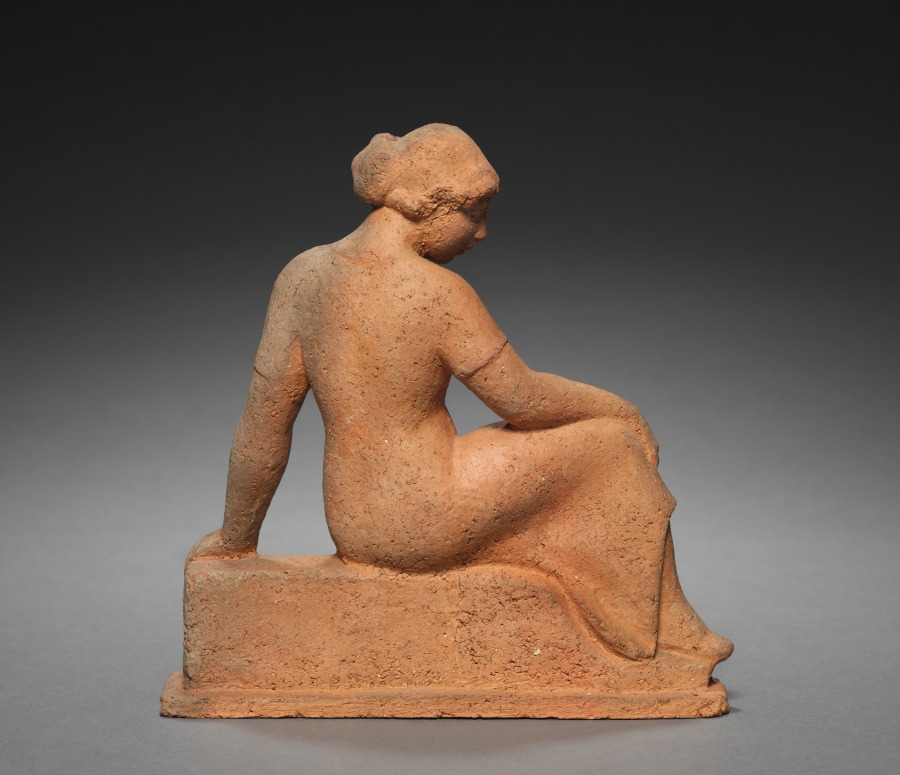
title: Seated Woman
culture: France, 20th century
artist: Aristide Maillol (French, 1861–1944)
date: c. 1900 – 1944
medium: terracotta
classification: Sculpture